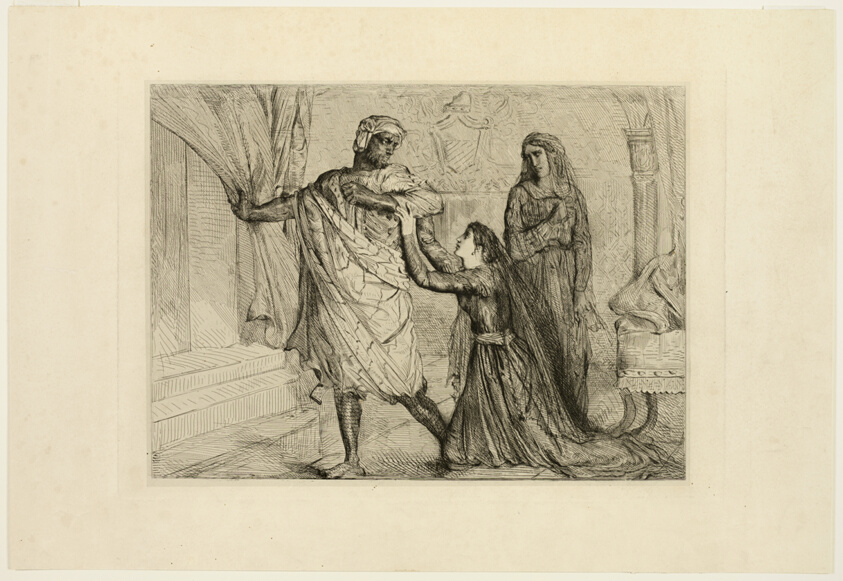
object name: Print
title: Away!, plate seven from Othello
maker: Théodore Chassériau (French, 1819-1856)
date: 1844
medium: Etching, engraving, roulette and drypoint on off-white China paper, laid down on ivory wove paper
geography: France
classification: etching; print; prints and drawing